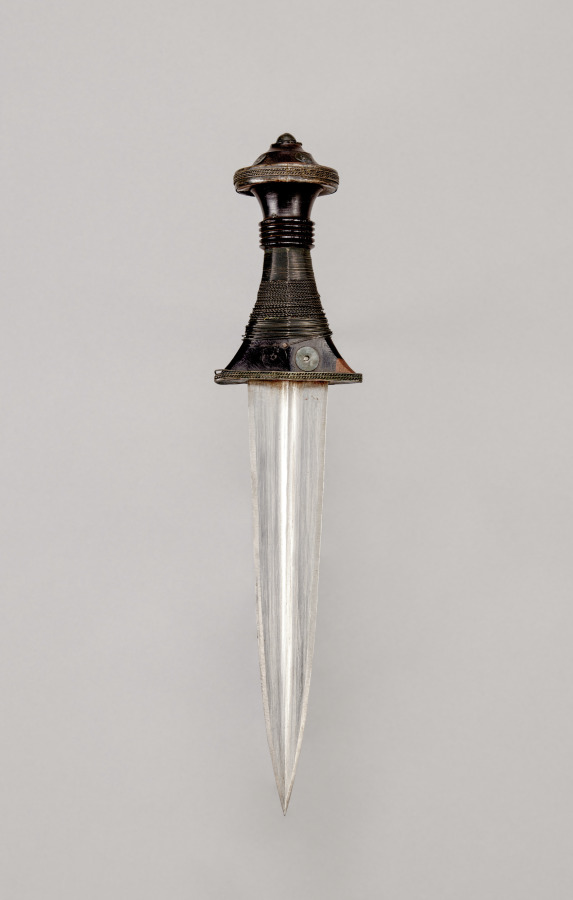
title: Dagger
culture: Africa, East Africa, Sudan, unknown maker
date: 1880–1910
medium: metal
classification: Arms and Armor